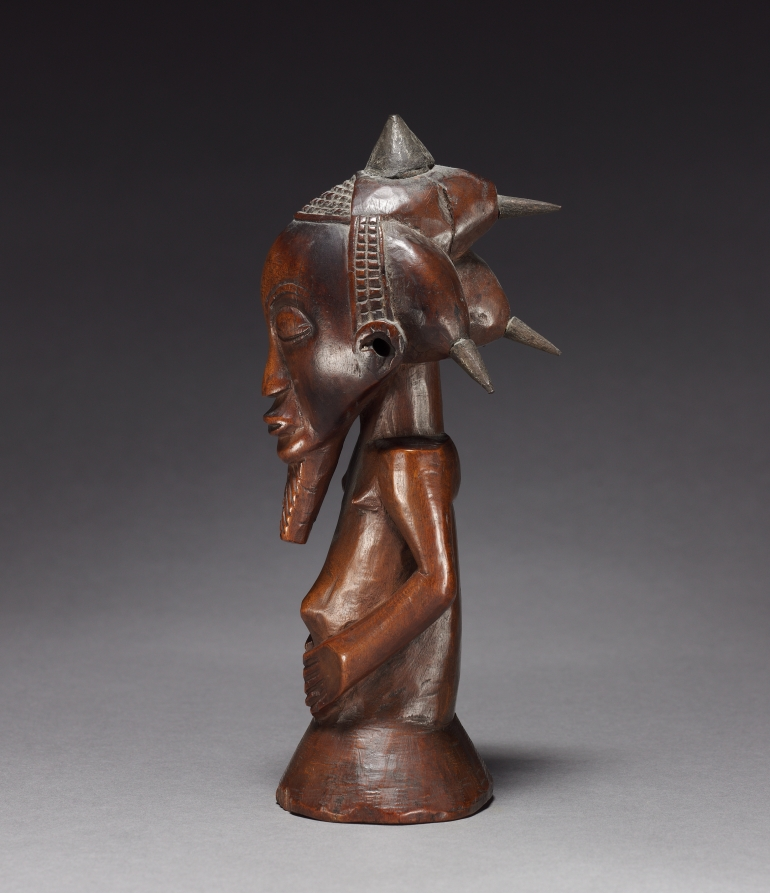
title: Half-Figure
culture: Africa, Central Africa, Democratic Republic of the Congo, probably Kusu-style maker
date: late 1800s–early 1900s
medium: Wood and iron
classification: Sculpture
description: Iron tacks inserted into the lobes of the hairdo indicate that this sculpture was originally empowered with magical and medicinal substances. Thus charged, the figure would have been used in divination and was related to a powerful association known as Bugabo. Members specialized in healing, hunting, and fighting crime.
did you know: This figure would have been used in a powerful association known as Bugabo, specializing in healing, hunting, and fighting crime.